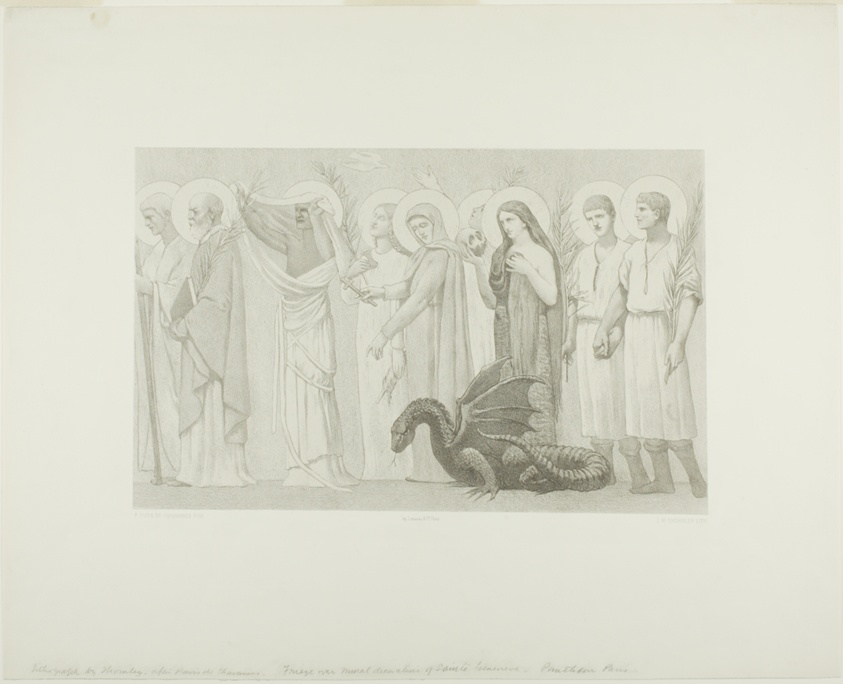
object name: Print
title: Pastoral Life of Saint Geneviève (right panel)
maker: Georges-William Thornley (French, 1875-1935); after Pierre Puvis de Chavannes (French, 1824-1898)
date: c. 1888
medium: Lithograph on paper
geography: France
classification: lithograph; print; prints and drawing